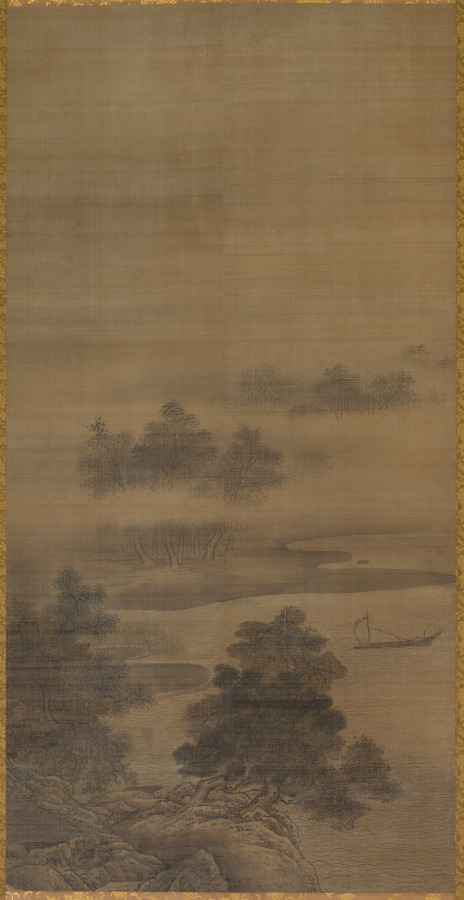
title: Returning Sails off a Distant Shore, from Eight Views of Xiao-Xiang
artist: follower of Sesshū Tōyō (Japanese, 1420–1506)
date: 1460s to 1550s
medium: Hanging scroll from a set of eight; ink and color on silk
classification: Painting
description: This painting and CMA 2015.590 belong to a group that was likely mounted as a pair of four-panel folding screens focusing on the Eight Views of Xiao-Xiang, a theme centered on an area in southern China. This one represents the motif “Returning Sails Off a Distant Shore.” Both emulate the style of Chinese painter Li Tang (about 1050–after 1130). Some scholars believe the paintings are the work of Sesshū Tōyō (1420–1506), the only Japanese painter of his day to have traveled to China.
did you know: Other paintings from the same set are in the collections of the Rhode Island School of Design and the Philadelphia Museum of Art.